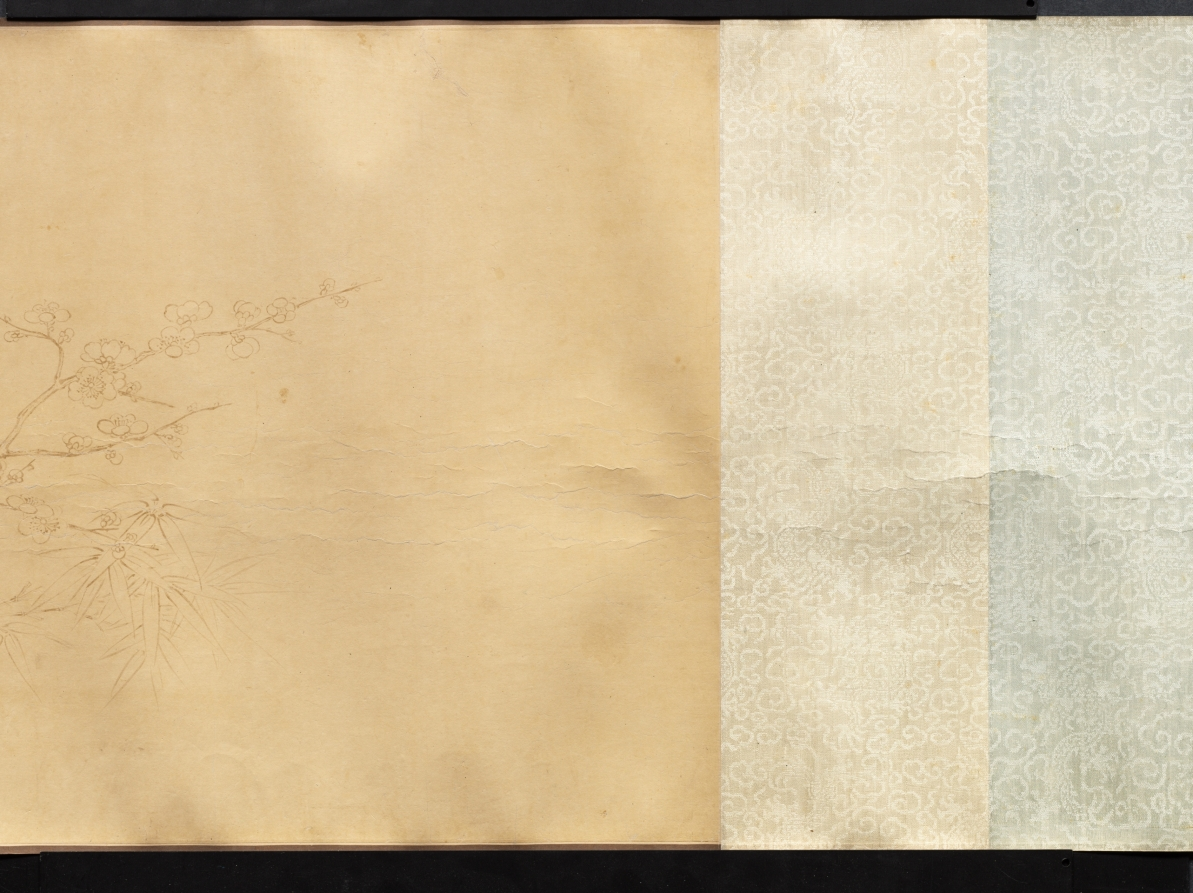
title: Landscape, The Palace of the Clouds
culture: China, Qing dynasty (1644-1911)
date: 1644–1911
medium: handscroll, ink on silk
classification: Painting